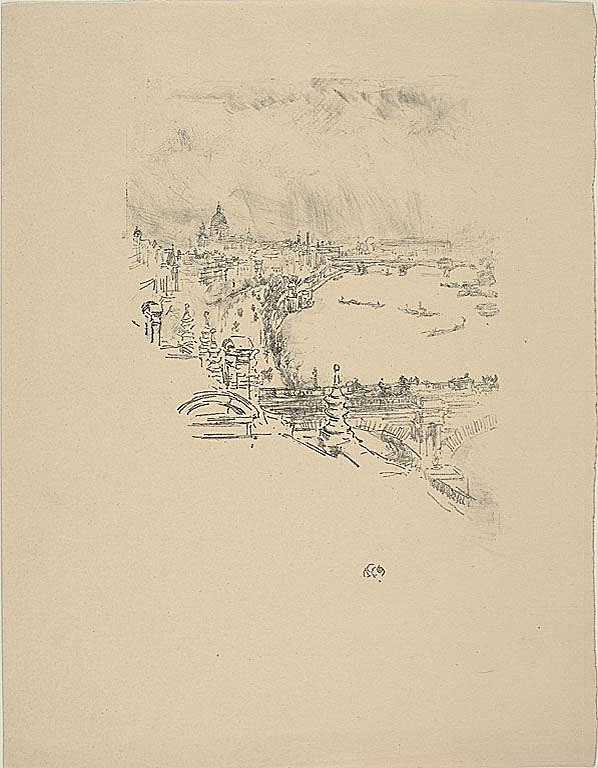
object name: Print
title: Little London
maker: James McNeill Whistler (American, 1834-1903)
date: 1896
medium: Transfer lithograph in black with stumping, on tan wove proofing paper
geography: United States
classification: transfer lithograph; lithograph; print; prints and drawing; paper